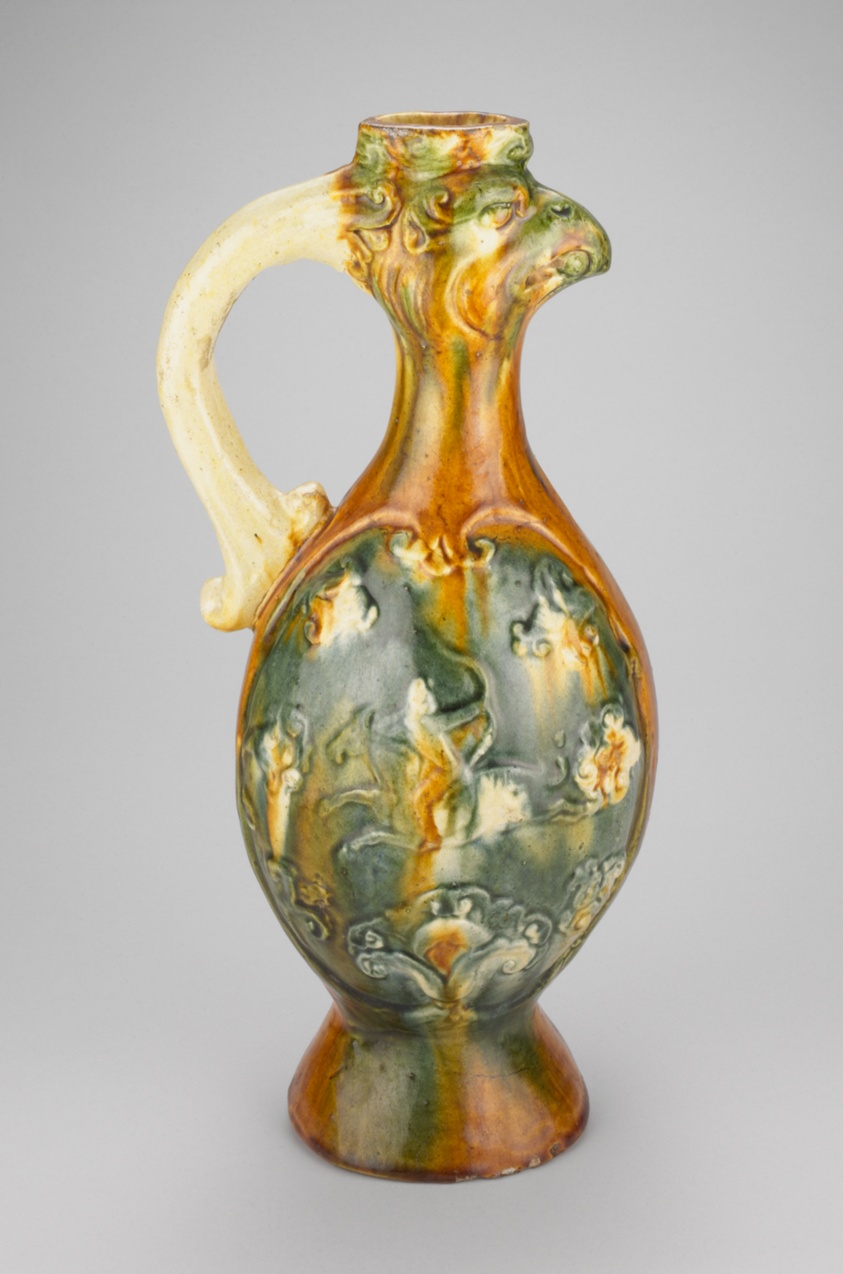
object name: Vessel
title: Phoenix-Headed Ewer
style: Chinese (culture or style)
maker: China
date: Tang dynasty (618–907), first half of 8th century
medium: Earthenware with molded decoration and three-color (sancai) lead glazes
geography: China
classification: ewer (vessel); vessel; earthenware; asian art; ceramics; decorative arts